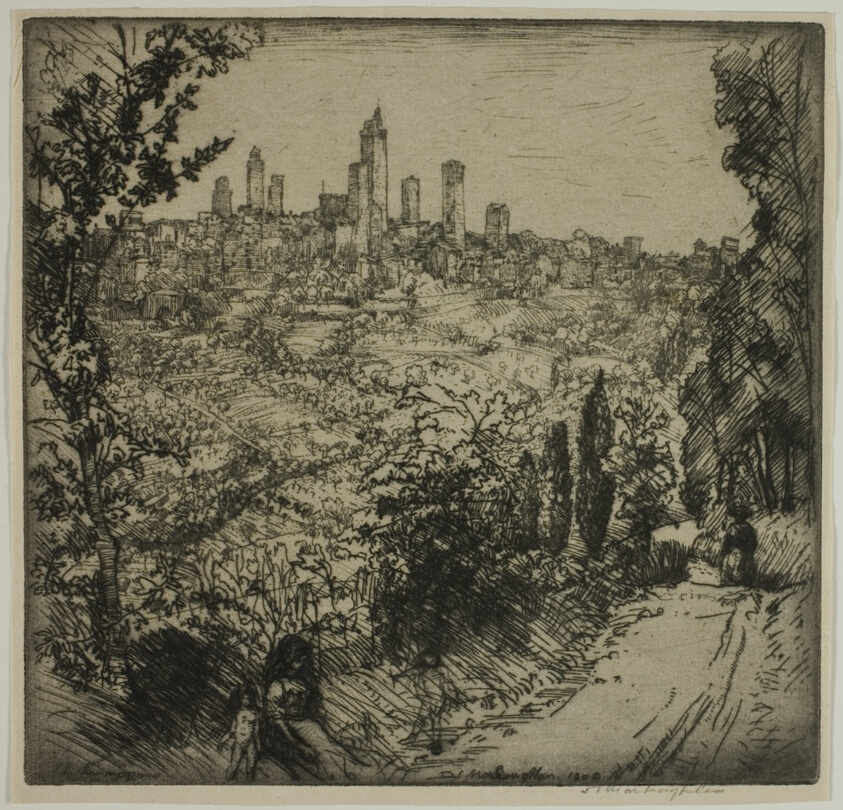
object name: Print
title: San Gimignano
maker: Donald Shaw MacLaughlan (American, born Canada, 1876-1938)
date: 1909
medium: Etching in black on cream laid paper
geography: United States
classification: etching; print; prints and drawing